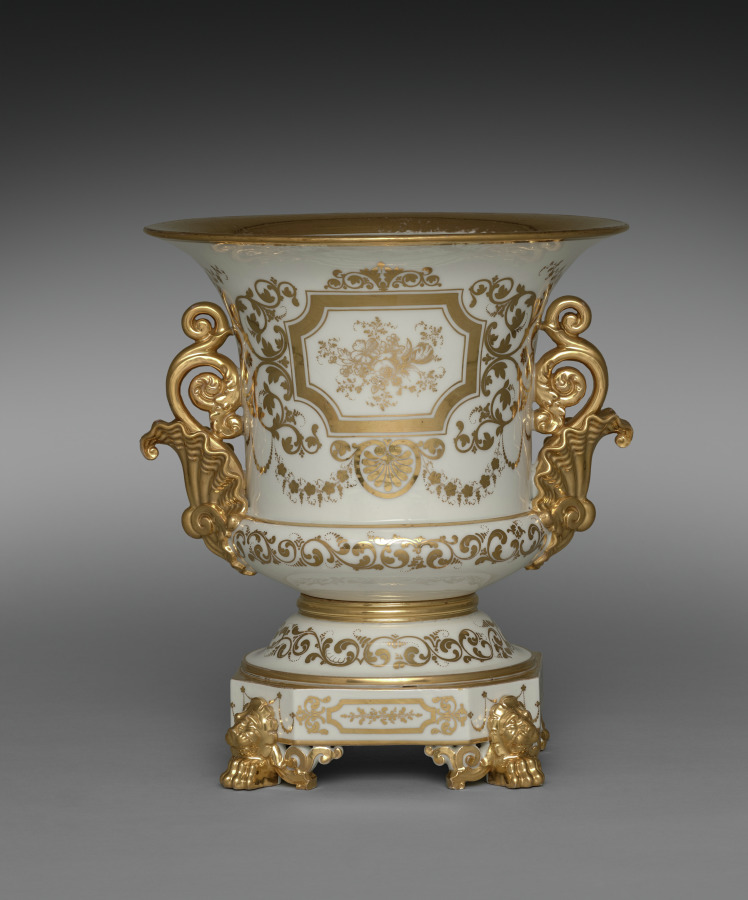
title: Ice Cream Pail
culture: France, Paris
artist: Factory of Jacob-Petit (French, 1830–1865)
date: c. 1840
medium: gilt porcelain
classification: Ceramic